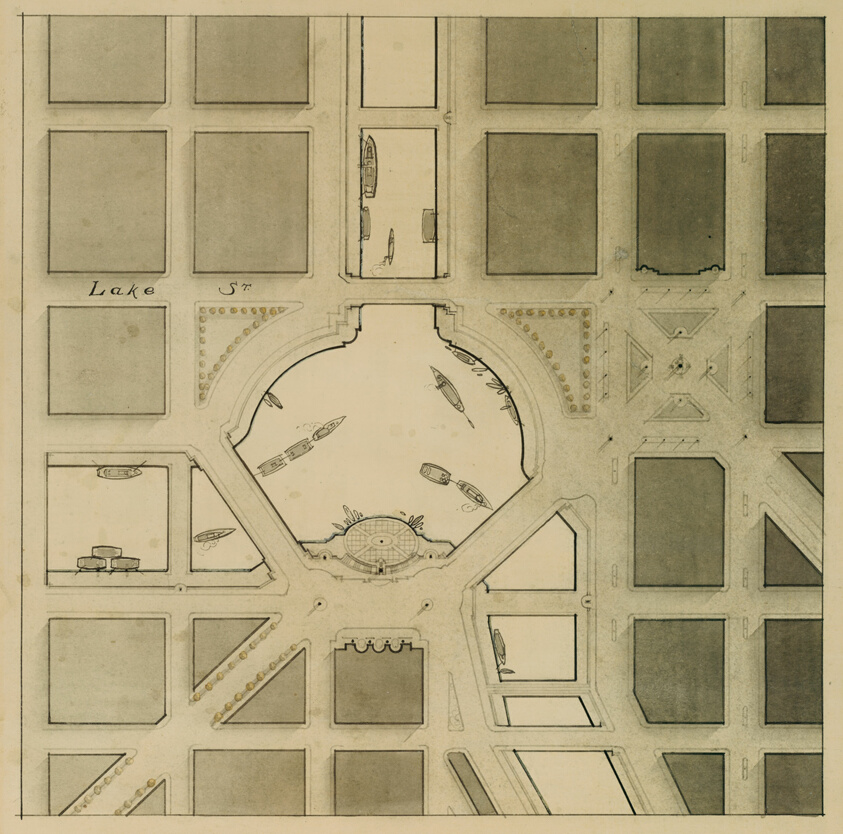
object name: Architectural Drawing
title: The Plan of Chicago Plate 106, Chicago, Illinois, Presentation Drawing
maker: Daniel Hudson Burnham (American, 1846–1912); Edward Herbert Bennett (American, born England 1874–1954)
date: 1909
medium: Ink and wash on paper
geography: Chicago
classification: ink; architectural drawing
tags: Chicago, architecture